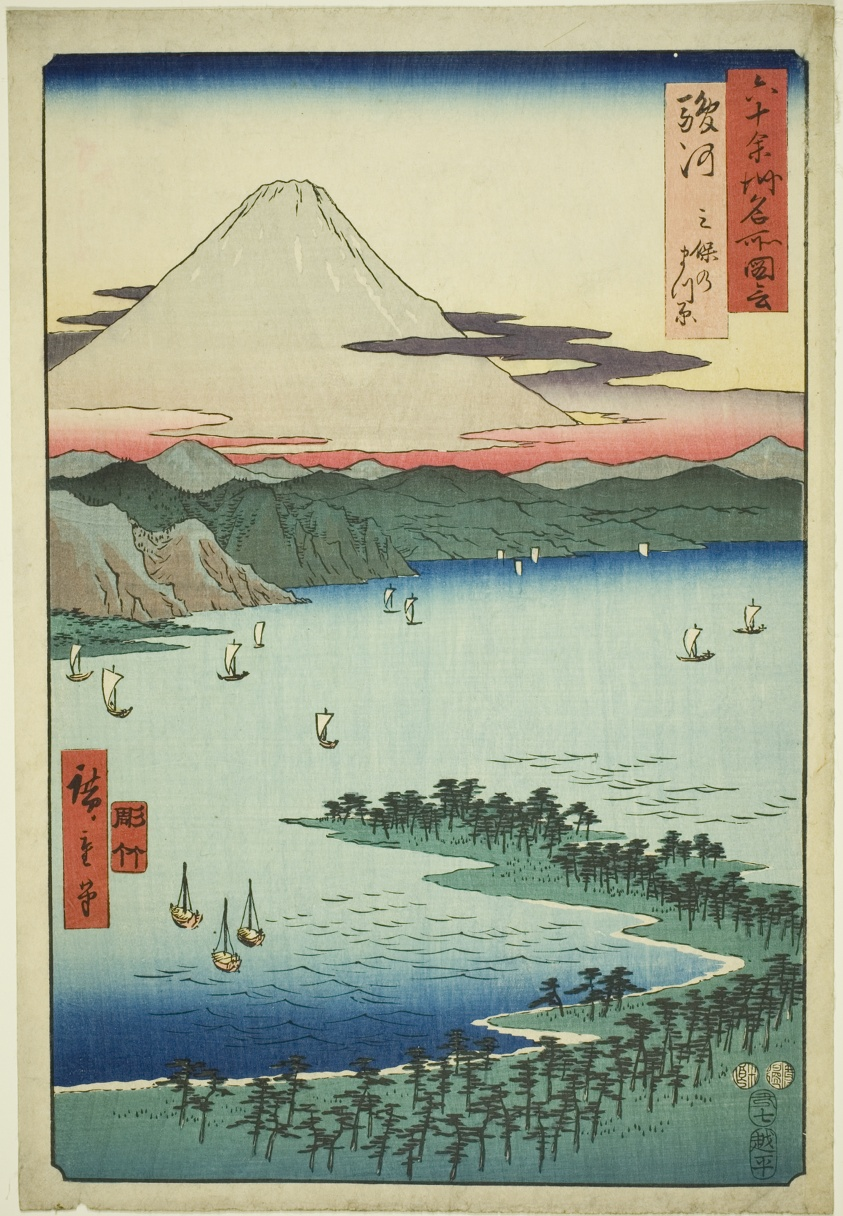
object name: Print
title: Suruga Province: The Pine Grove at Miho (Suruga, Miho no matsubara), from the series "Famous Places in the Sixty-odd Provinces (Rokujuyoshu meisho zue)"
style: Japanese (culture or style)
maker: Utagawa Hiroshige 歌川 広重; Japanese, 1797-1858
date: 1853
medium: Color woodblock print; oban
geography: Japan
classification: woodblock print; print; asian art